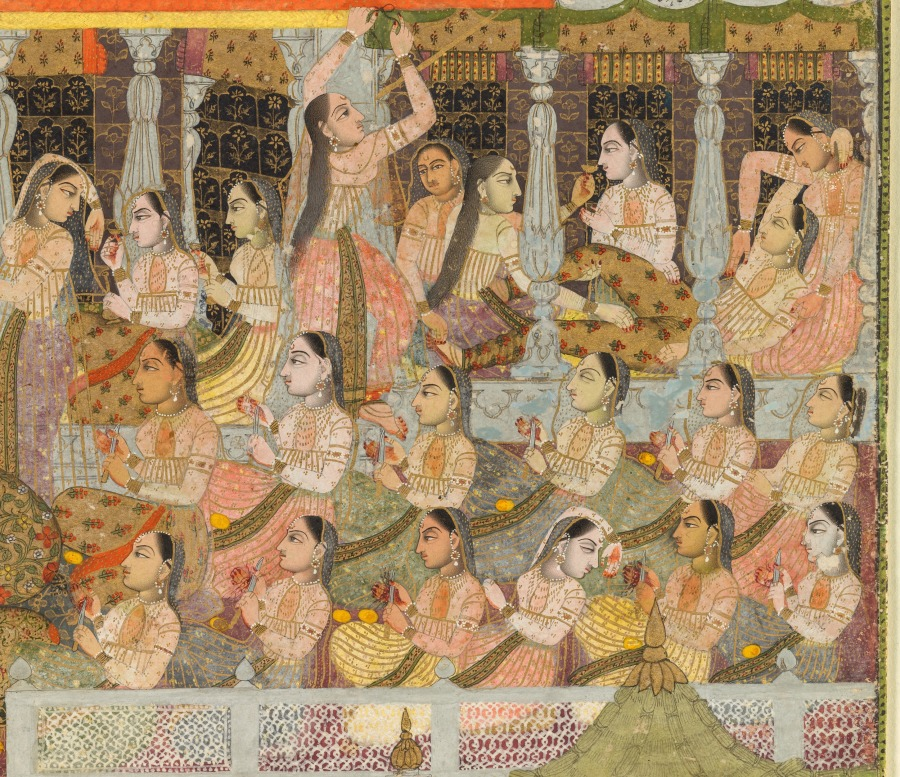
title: Lovers and beloveds: A composite of scenes from Persian, Urdu, and Sanskrit literature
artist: Chitarman II (Indian, c. 1680–с. 1750)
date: c. 1735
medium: Gum tempera and gold on paper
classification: Painting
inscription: Persian inscriptions throughout, in nasta‘liq script: Top left: The celebrated lover Ranjha; Top right, above awning: The notable ladies of the city falling into a swoon having caught sight of Joseph’s beauteous countenance; Top center, on pillar beneath canopy: The celebrated lover Vamiq; On another pillar, behind the woman’s head: The celebrated beloved ‘Azra; Upper left, on pillar: King Nala, the lover; Central figure with halo: The coming from the prison and sitting [in state] of the Lord Joseph the Prophet, with the women of the town cutting the palms of their hands and falling down unconscious; Left of center: [. . . cutting palms . . . wine cups fell from their hands . . . state of wonderment . . .]; Central pavilion at left: Sassi, the beloved the lover [Punnun]; Below central figure of Joseph: The stream of milk Shirin the beloved, weeping The death of Farhad, the lover; Lower right, in front of bearded man: Hafiz of Shiraz; Below his decanter: The stick of candy [referring to the woman with whom, according to popular lore, Hafiz was supposed to have fallen in love as a youth]; Behind the pavilion at right: Bride descending into a grave . . .; On the white railing to the left: Khwaja Bu Ali . . .; Bottom left: Queen Padmavati, the beloved, King Ratnasena, the lover; Bottom right: Majnun, the lover; On page held by Majnun: Say, “He is Allah, who is One, Allah the eternal refuge. He neither begets nor is born, Nor is there to Him any equivalent.” [Qur'an, chapter 112]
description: The figure of Joseph, identified by his halo, sits in the center near the top of this painting of heroes and heroines of ten different Persian, Urdu, and Sanskrit romances. The depicted scene occurs after Joseph has been purchased by Zulaykha in Egypt. Zulaykha, wishing to show him off to her friends and acquaintances, invites them to her home where she supplies oranges and knives. When the women see Joseph, they all are so distracted by his divine beauty that they accidentally cut their hands while peeling their oranges, but remain mesmerized by his appearance. The dramatic scene in the center is from the Persian romance of Khusrau and Shirin, in which Farhad, a stonecutter who loved Shirin, threw himself to his death from a mountaintop after hearing news of Shirin’s death, falsely sent to him from his rival Khusrau. The emaciated Majnun is in the lower right corner. Every vignette has been identified with a tiny Persian inscription.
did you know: Below the bearded poet Hafiz is the woman he loved; her name was Stick of Candy.